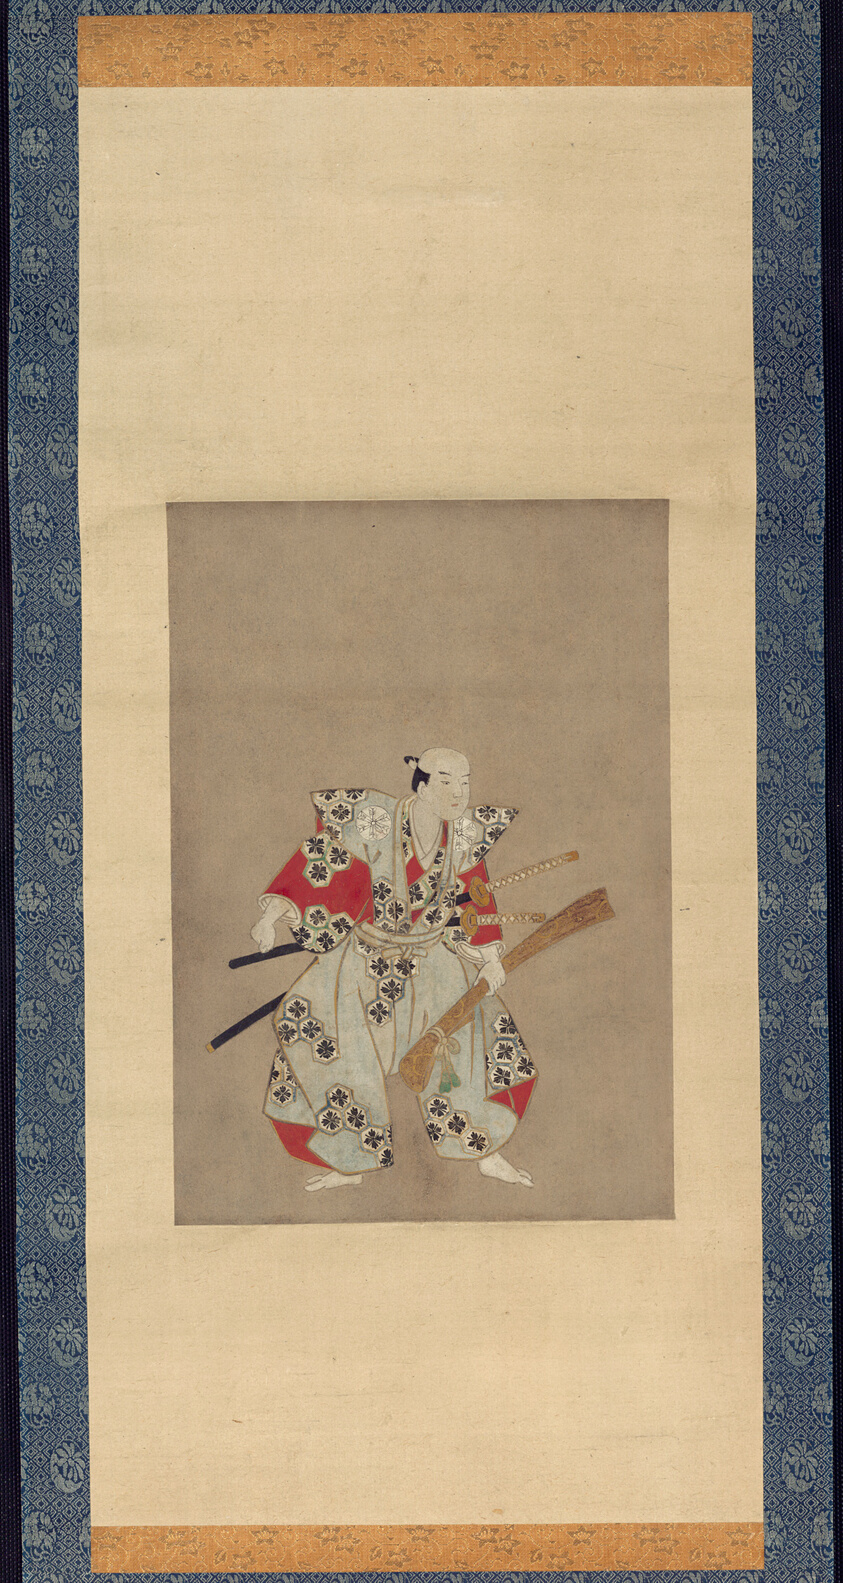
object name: Painting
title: An Actor on Stage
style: Japanese (culture or style)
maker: Artist unknown; Japanese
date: Edo period, 1720–1730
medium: Album sheet mounted as hanging scroll. Ink and colors on paper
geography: Japan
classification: hanging scroll; painting; asian art